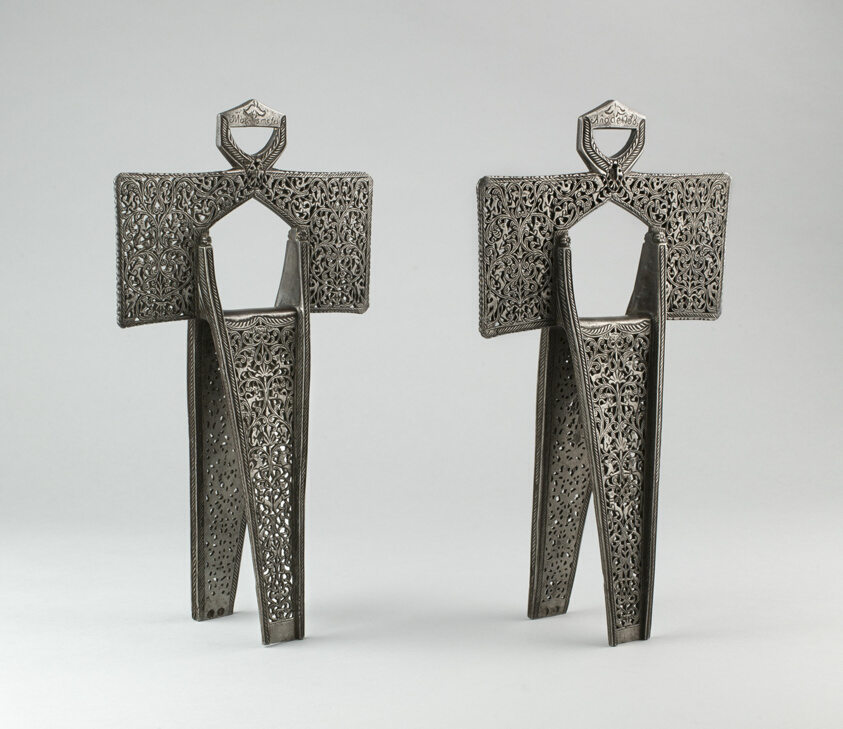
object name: Armor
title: Pair of Stirrups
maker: Mexican; Master Morales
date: 1738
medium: Iron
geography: Mexico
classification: horse equipment; armor; arms and armor